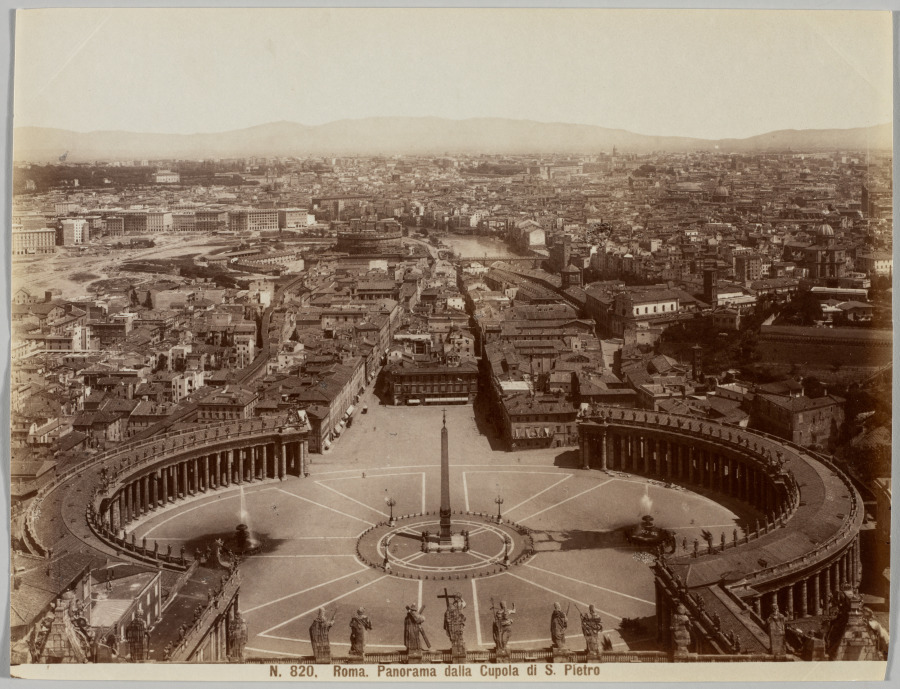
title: Panorama dalla Cupola di S. Pietro, Rome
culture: Italy, 19th century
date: 1885–95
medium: albumen print from collodion negative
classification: Photograph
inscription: Imprinted on recto of photograph: “N. 820. Roma. Panorama dalla Cupola di S. Pietro” Written in pencil on verso: “IT-197/450” Written in pencil on verso: “M.W.-93”